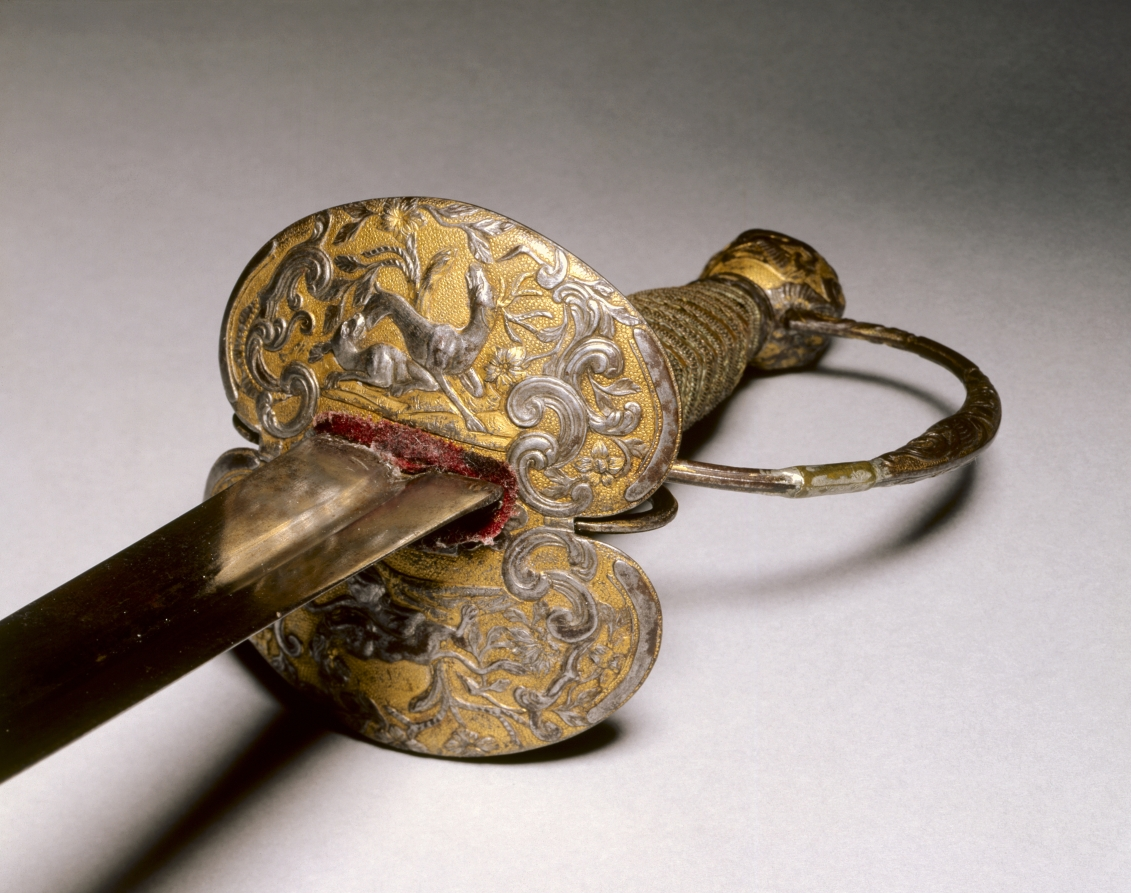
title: Small Sword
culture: France, Paris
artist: after a design by Jean-Baptiste Oudry (French, 1686–1755)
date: c.1750–60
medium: steel, gilt and russeted, copper, wood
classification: Arms and Armor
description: The hilt, pommel, and guard of this sword are richly chiseled in low relief against a stippled gold background with animals (dogs, a stag, ducks) that appear to be adapted from paintings by Jean-Baptiste Oudry (1686–1775). An elegant court sword such as this was an important accessory to a gentleman's attire, yet remained functional—it could be withdrawn for an impromptu duel.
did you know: Although fully functional, this sword was used more for show—a perfect accessory for a fashionable gentleman having his portrait painted.